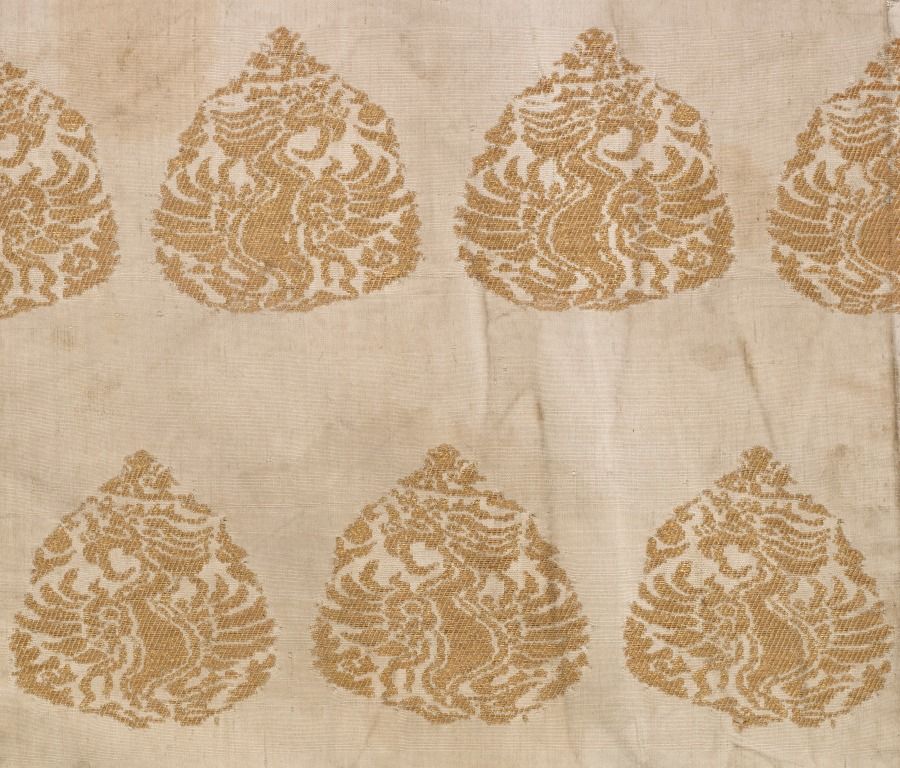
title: Brocade with Phoenixes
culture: Central Asia, Jin dynasty (1115-1234)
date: 1100s–1200s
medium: tabby, brocaded; silk and gold thread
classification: Textile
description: This elegant brocade of phoenixes, seen almost frontally, is woven with gold thread made from flat strips of gilded paper instead of the usual strips of gilded parchment. This suggests that the textile was woven in the southern part of the Jin state that had been annexed from the Chinese. Although probably intended to serve as secular clothing, this textile ended up in a Buddhist institution. The end was folded and stamped in red ink with a seated Buddha flanked by two Bodhisattvas (now faint and upside down). Two Tibetan inscriptions were also stamped (translation: "The Bhagavan, the Tathagata, the Arhat, the completely perfect Buddha," and "Salutations to Blo gnas.") Above, an isolated letter ka indicates that the textile was used to cover the first volume of a set of books.